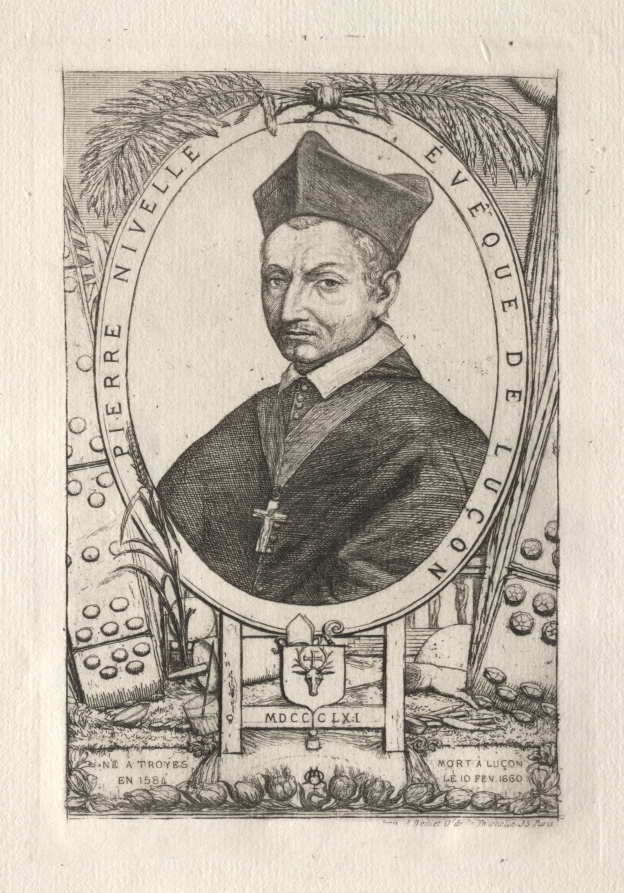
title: Pierre Nivelle, Bishop of Luçon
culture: France, 19th century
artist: Charles Meryon (French, 1821–1868)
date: 1861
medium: etching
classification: Print